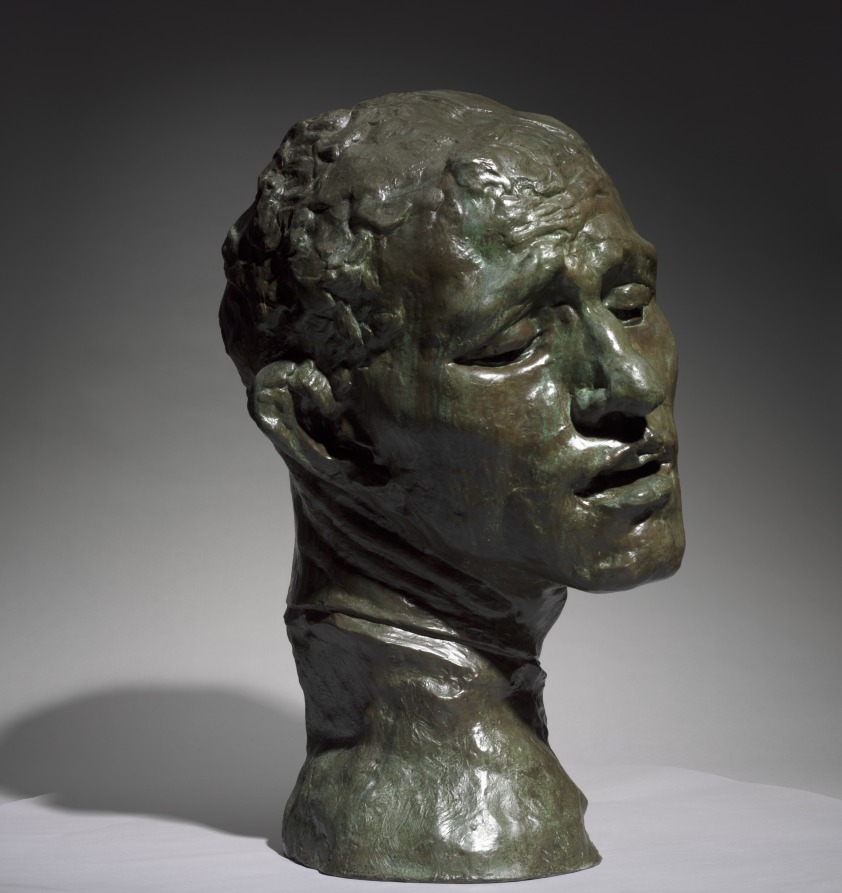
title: Heroic Head of Pierre de Wissant, One of the Burghers of Calais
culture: France, 19th century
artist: Auguste Rodin (French, 1840–1917)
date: 1886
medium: bronze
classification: Sculpture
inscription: inscribed at neck, left: A.Rodin; inscribed lower back: Alexis Rudier/Fondeur-Paris.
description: This sculpture depicts one of the figures in Rodin’s large public monument The Burghers of Calais (1884–89), featuring six French men who volunteered to be taken prisoner by the English in exchange for lifting the siege of Calais during the Hundred Years War (1337–1453). Pierre de Wissant’s anguished expression suggests extreme mental suffering as he contemplates his expected execution. Rodin exhibited a life-size version of the figure as an independent work before completing the monument. He later made multiple versions in various sizes and media.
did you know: This sculpture depicts the head of a figure from Rodin's large public monument The Burghers of Calais (1884-89). The CMA also owns a plaster version of the head.